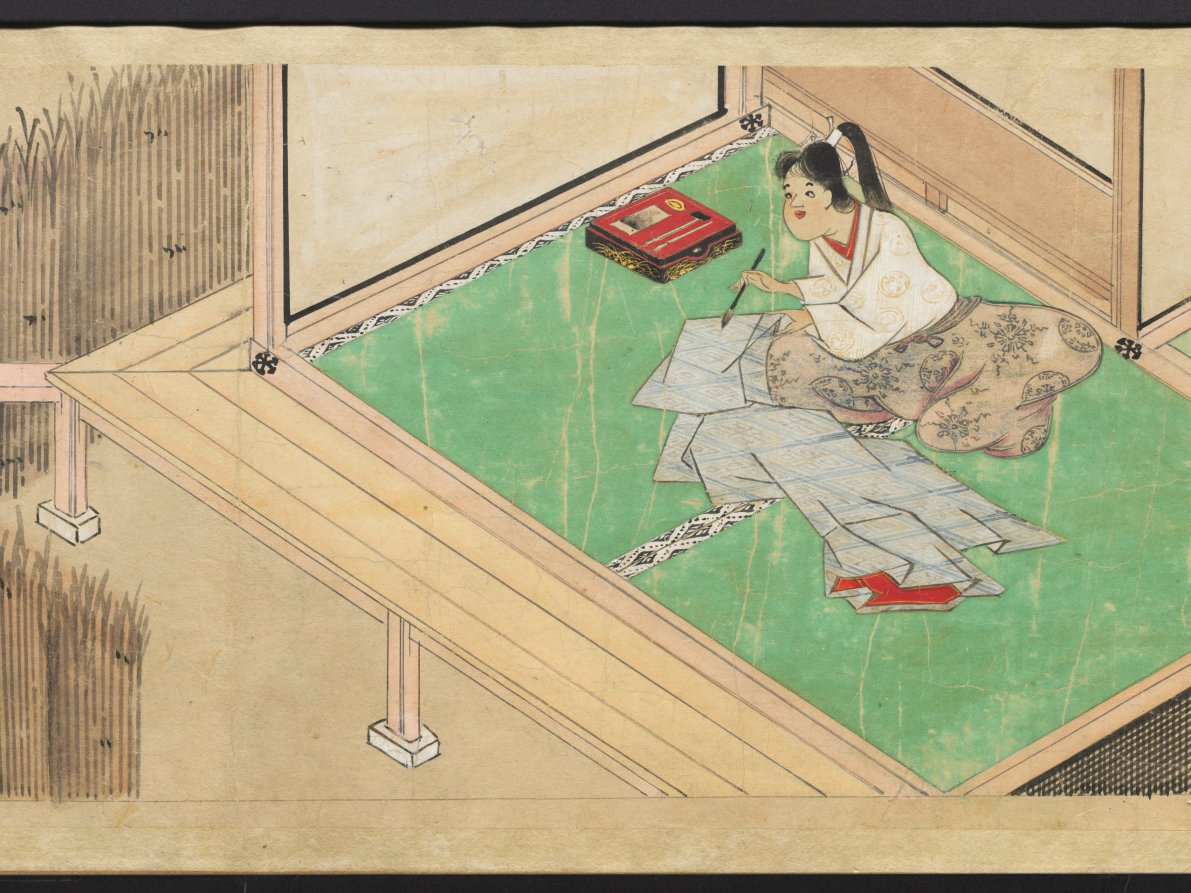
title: The Saltmaker's Story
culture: Japan, Edo period (1615–1868)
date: early 1600s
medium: One of a pair of handscrolls; ink, color, and gold on paper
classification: Painting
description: Once read and copied by girls at New Year’s celebrations and included in dowries, The Saltmaker’s Story is a rags-to-riches tale in which daughters are gifts from the gods. Despite his simple outlook, the main character progresses from humble roots as an associate at Kashima Shrine to the elite status of grandfather of the emperor through the intervention of the Kashima deity. The Saltmaker’s Story is traditionally presented in a set of three scrolls, but the text of this set has been removed by a previous owner, who remounted the illustrations as a pair. The paintings of this one take us from right to left through the first half of the tale.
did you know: This handscroll originally had texts before its paintings, but the texts were removed.